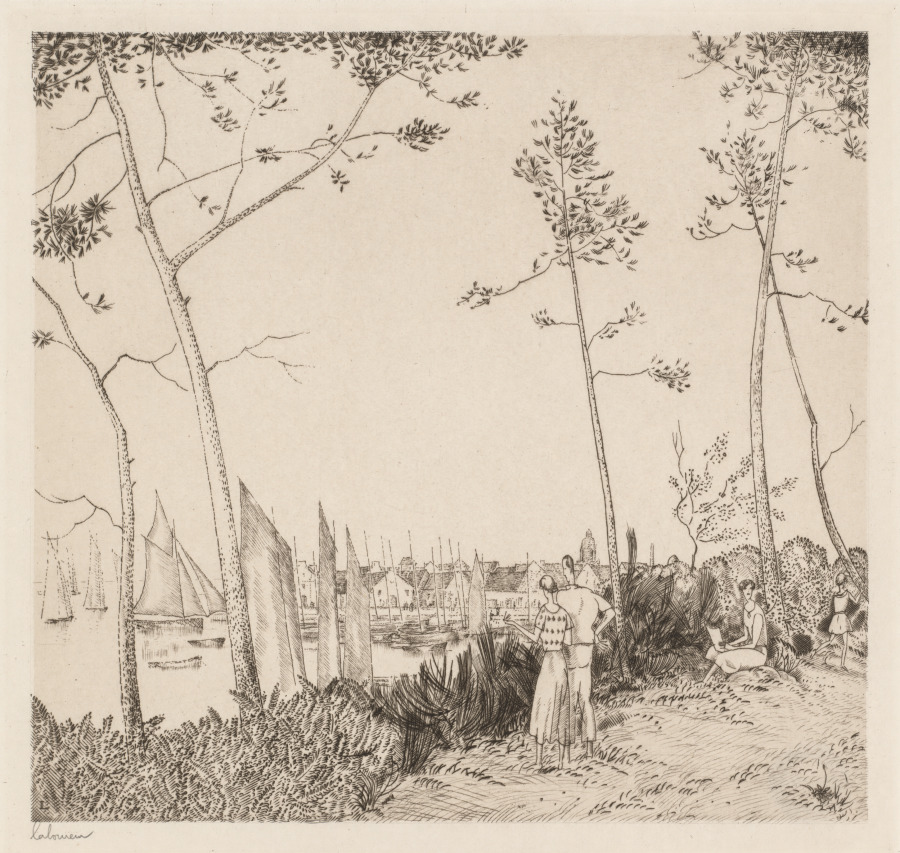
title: La Promenade sur le Port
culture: France, 20th century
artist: Jean-Émile Laboureur (French, 1877–1943)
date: 1935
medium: etching and line engraving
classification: Print